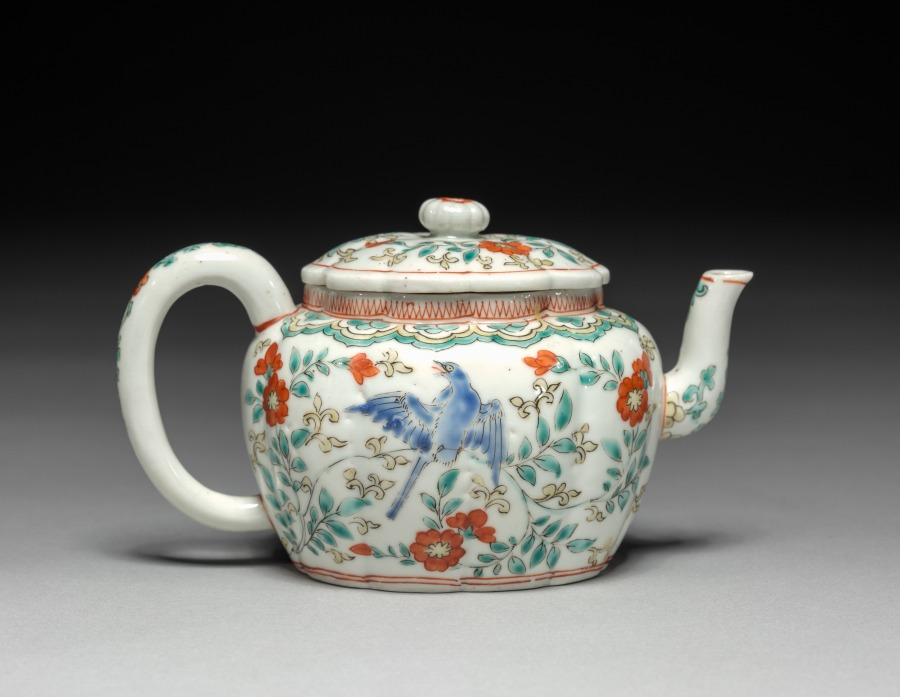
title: Teapot with Birds and Flowers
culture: Japan, Edo period (1615–1868)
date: 1700s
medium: Porcelain with overglaze color enamel (Arita ware)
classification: Ceramic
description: This small vessel was likely made as a teapot for the European export market. The different colored overglaze enamels, orange, blue, green, and yellow, combine with a wiry black outline to form the design of a singing bird on a flowering bough repeated on each side of the pot.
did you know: The wood storage box for this pot refers to it as a suichū, which means water ewer.